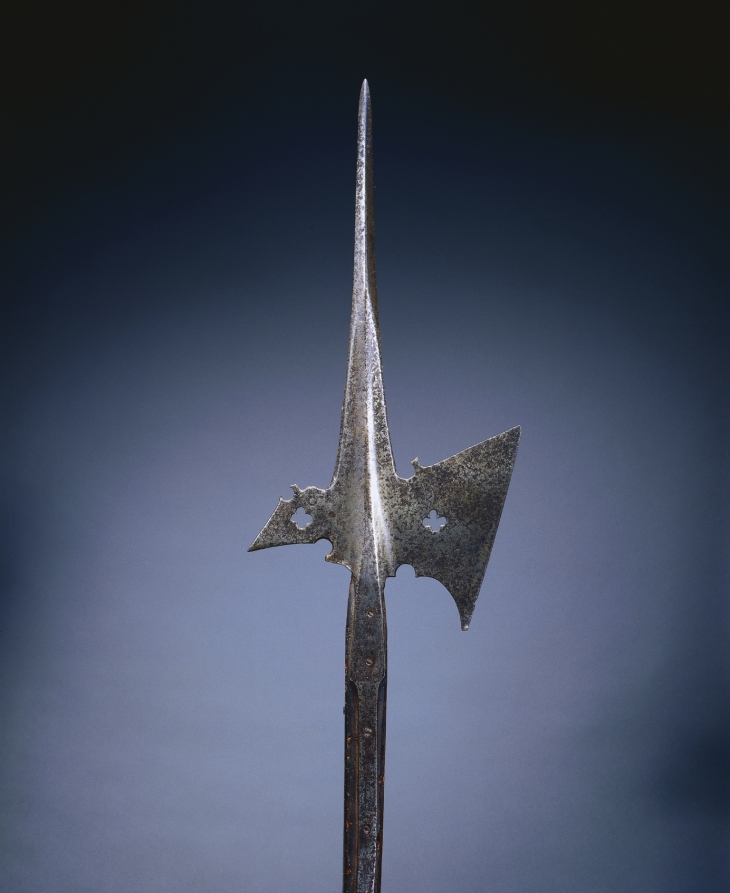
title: Halberd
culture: Germany (?)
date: c. 1500–1525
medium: steel, quatrefoil piercing; wood haft (rectangular with planed corners)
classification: Arms and Armor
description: The halberd was a staff weapon favored by European infantries (foot soldiers) of the 1400s and 1500s for its versatility and deadly effect. The word halberd comes from the German words Halm (staff) and Barte (axe). The halberd is, in fact, an axe that served multiple functions: the axe blade was used for hacking, the spike for thrusting, and the beak for piercing plate armor or for pulling a knight from his saddle. The halberd was used by shock troops (those who lead an attack) and by Swiss and German mercenaries. After about 1550, the halberd gradually became less functional. Its large blade provided space for coats of arms and insignia. By the late 1500s, the parade halberd had become a ceremonial weapon for palace guards.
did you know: Halberds could vary in length but most are around 6.5 feet.